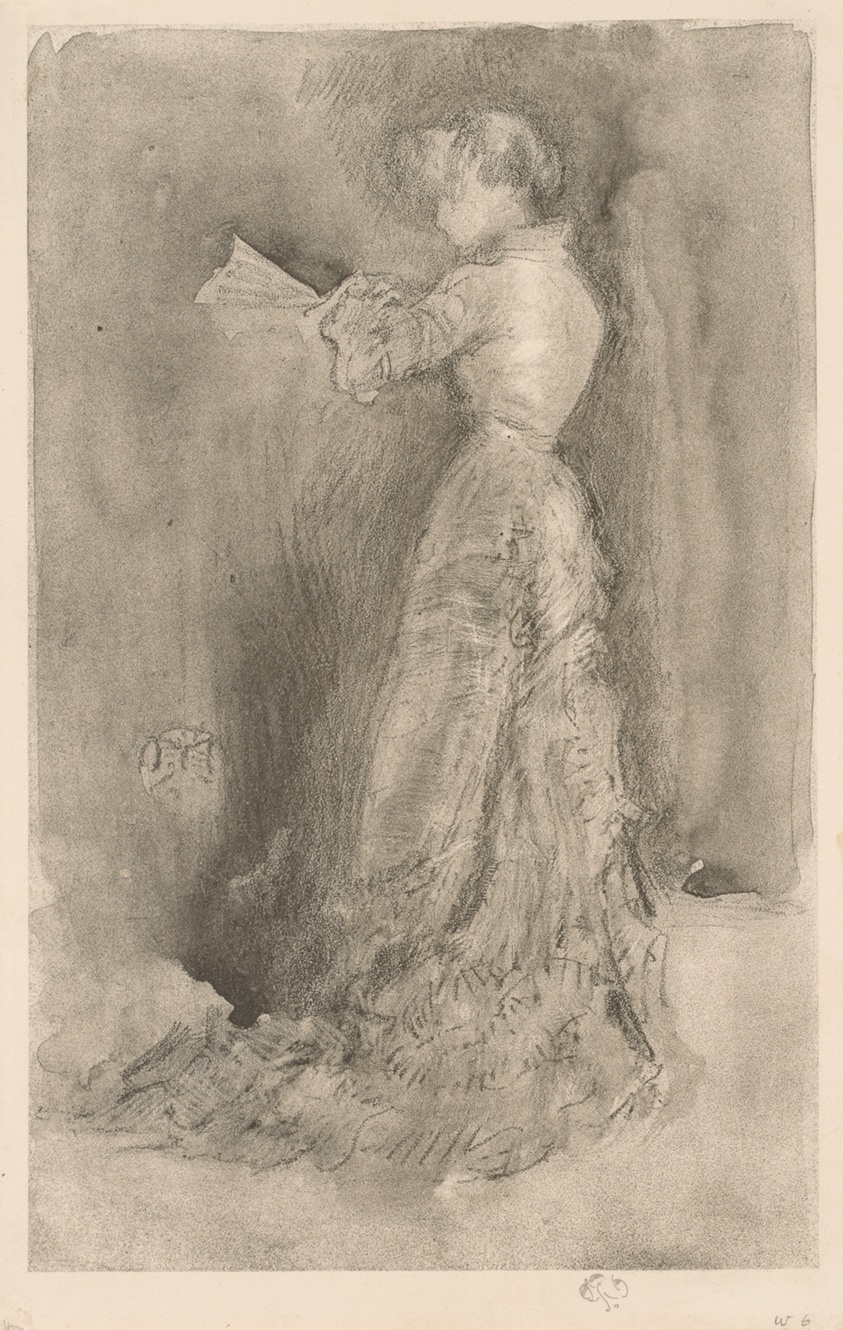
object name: Print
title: The Toilet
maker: James McNeill Whistler (American, 1834-1903)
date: 1878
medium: Lithotint with scraping and incising, on a prepared half-tint ground, in black on cream wove paper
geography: United States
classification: lithotint; lithograph; print; prints and drawing; paper